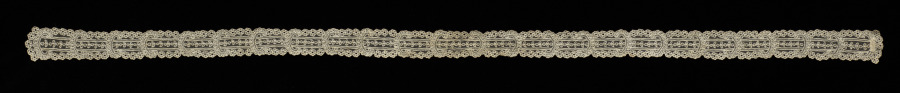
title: Lace Strip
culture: Flanders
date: 1800s (after 1810)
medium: Machine made lace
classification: Lace